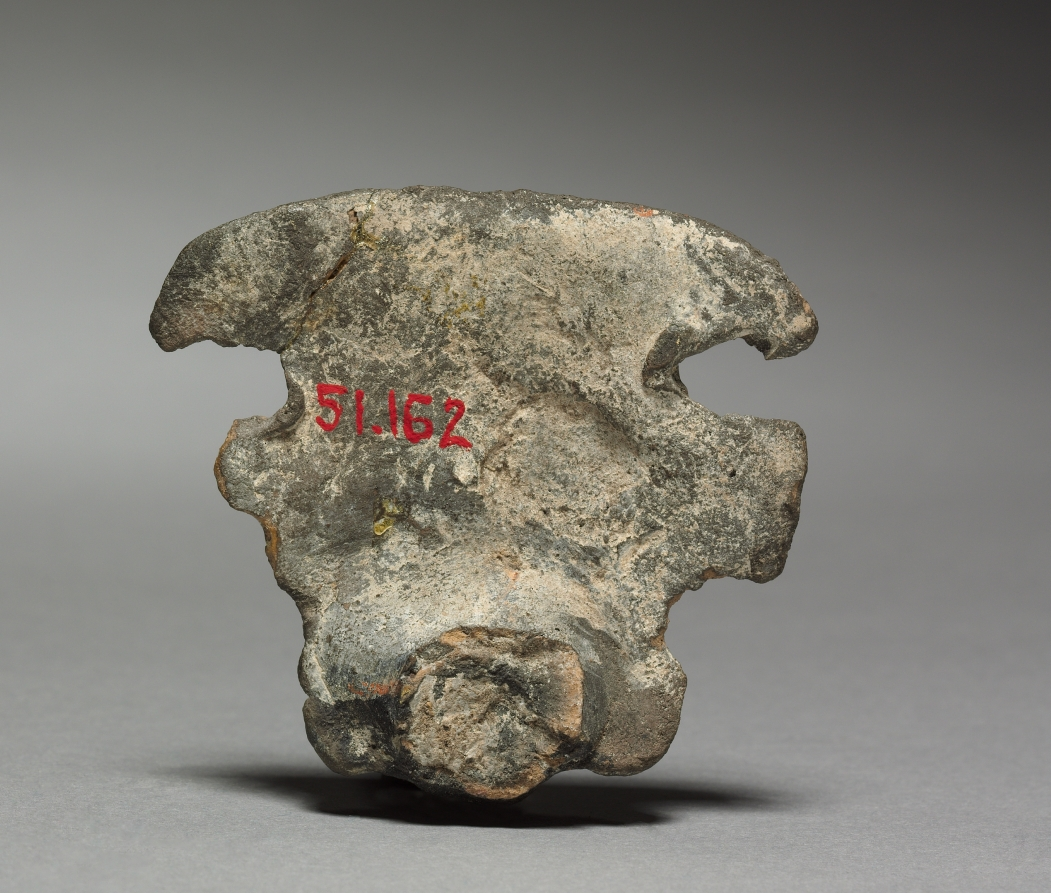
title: Figurine Head Fragment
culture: Central Mexico, Teotihuacán style, Classic period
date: 1–550 CE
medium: molded earthenware with pigment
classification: Ceramic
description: The use of press molds at Teotihuacan permitted mass production of elaborately costumed human figurines. Lavishly ornamented headdresses are also worn by figures depicted on Teotihuacan's fresco-painted walls.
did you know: Showy rows of sculpted feathers may represent those of the shimmering green quetzal bird.